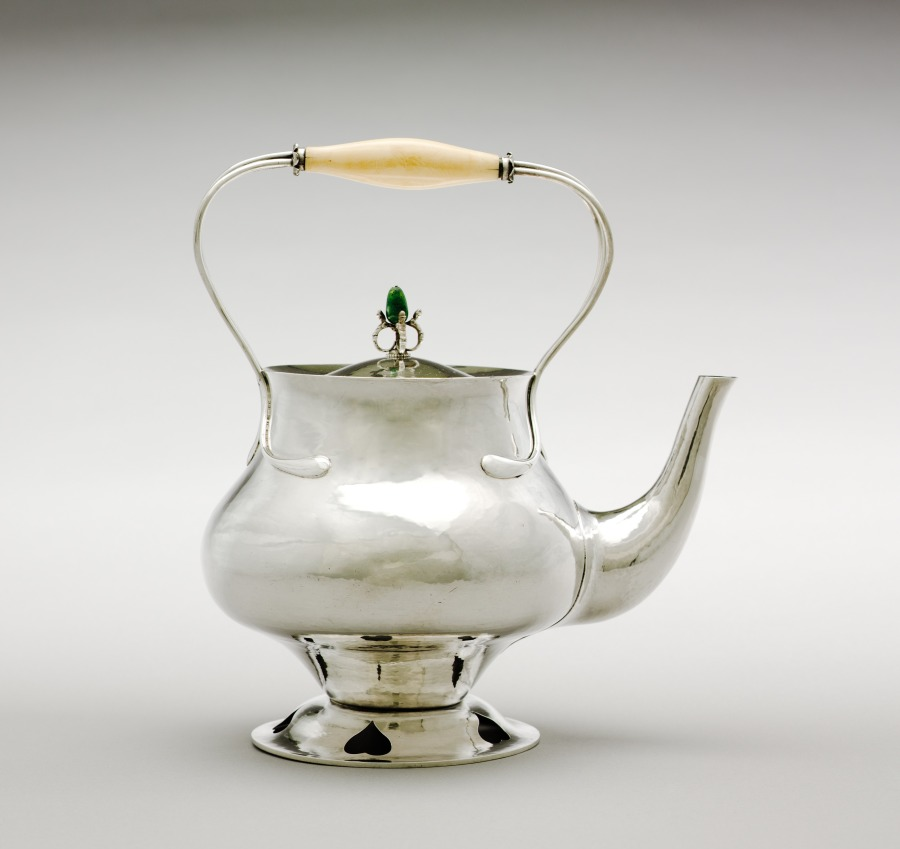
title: Kettle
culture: England, late 19th-early 20th Century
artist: Charles Robert Ashbee (British, 1863–1942)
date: 1900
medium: silver with ivory handle and chrysoprase finial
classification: Silver